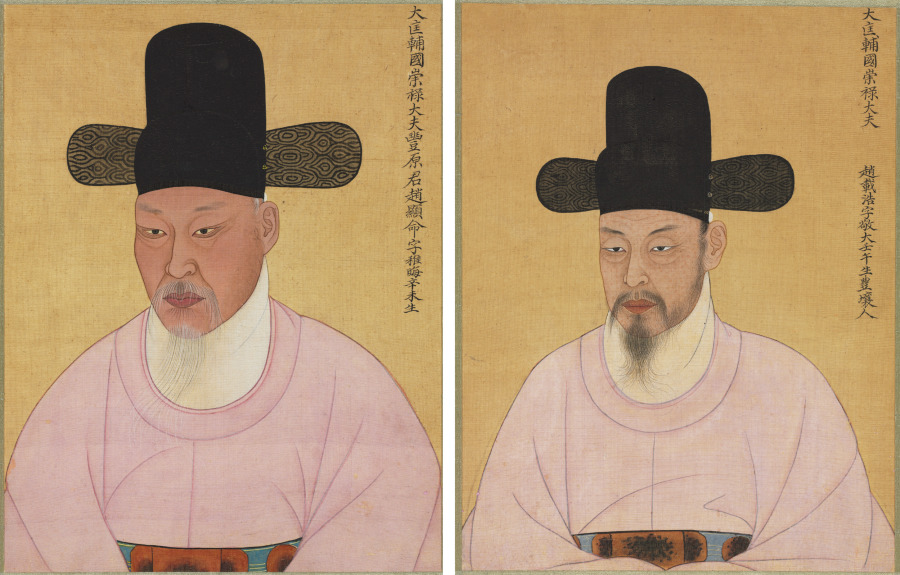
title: Portraits of Cho Hyun-myeong and Cho Jae-ho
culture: Korea, Joseon dynasty (1392–1910)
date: early 1800s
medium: Pair of album paintings; ink and color on silk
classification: Painting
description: These two portraits are of members of the Cho family, which originated from the area of Pungyang. Cho Jae-ho (1702-1762) on the left is the cousin of Cho Hyun-myeong on the right. Both were High State Councilors, called yeong-uijeong, and the Cho family ordered these two portraits as a family honor. Korean portraits were copied for sharing at each family Confucian ritual; similar portraits are still in the collection of the Cho family in Korea.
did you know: These two men belonged to the Pungyang Cho Clan, one of the most important political power houses in 18th-century Korea.